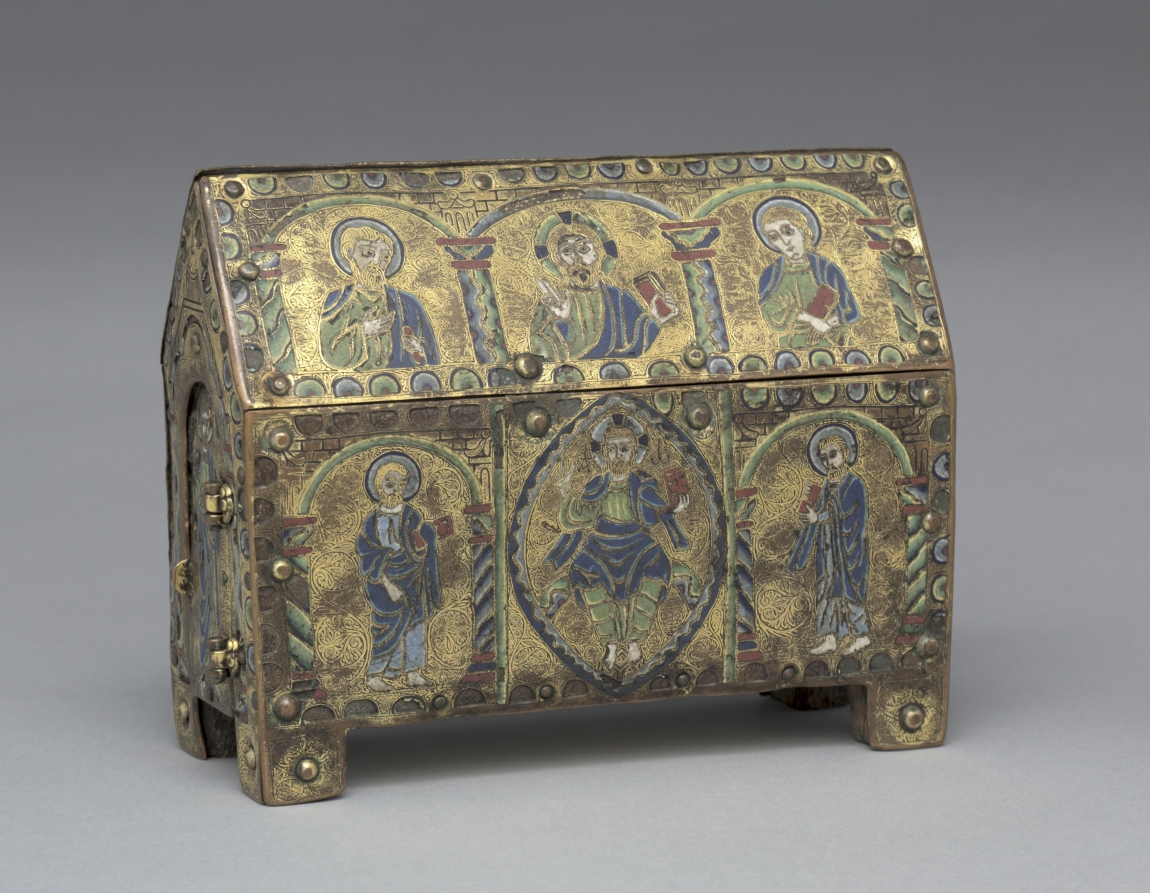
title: Chasse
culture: France, Limousin, Limoges, Gothic period, first half of 13th century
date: 1200–1250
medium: copper: gilded, engraved, chased; champlevé enamel; wood core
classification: Enamel